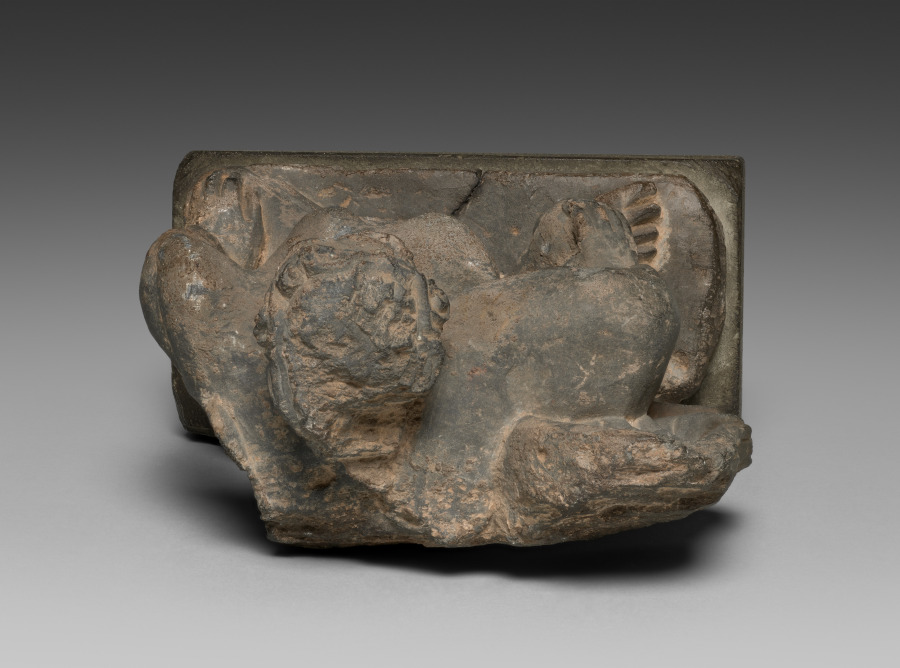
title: Winged Atlas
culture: Pakistan, Gandhara, Kushan period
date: c. 100s–200s CE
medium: gray schist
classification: Sculpture